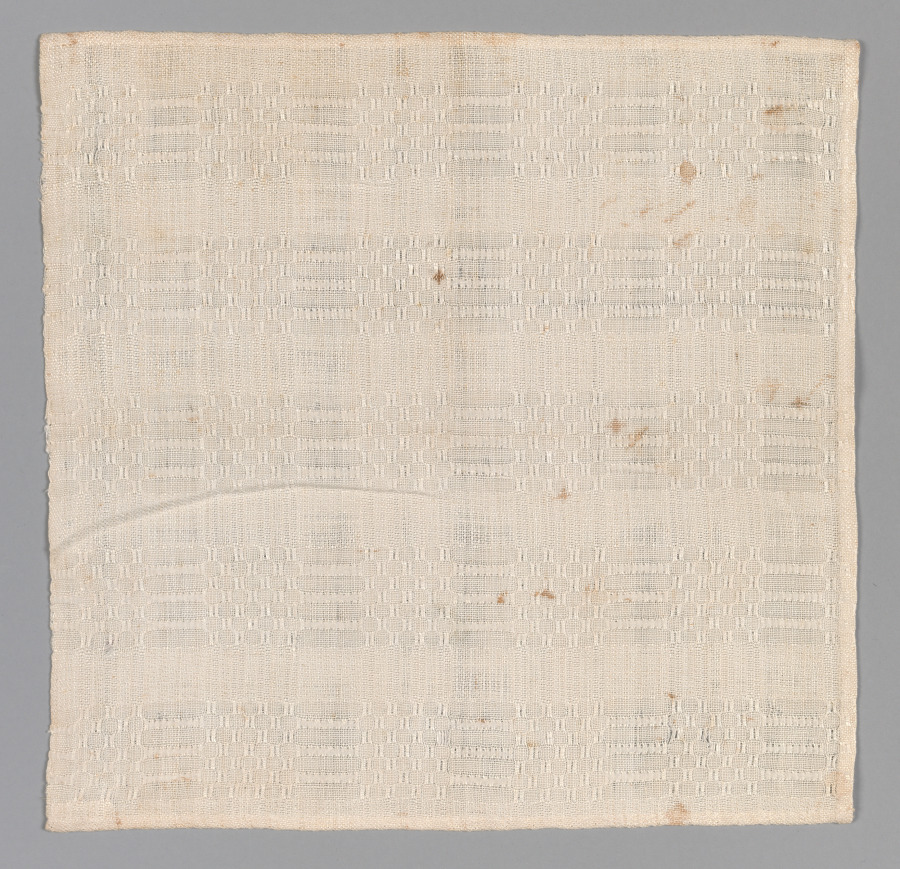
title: White Linen Textile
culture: America, Connecticut, early 19th Century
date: c. 1800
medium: linen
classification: Textile